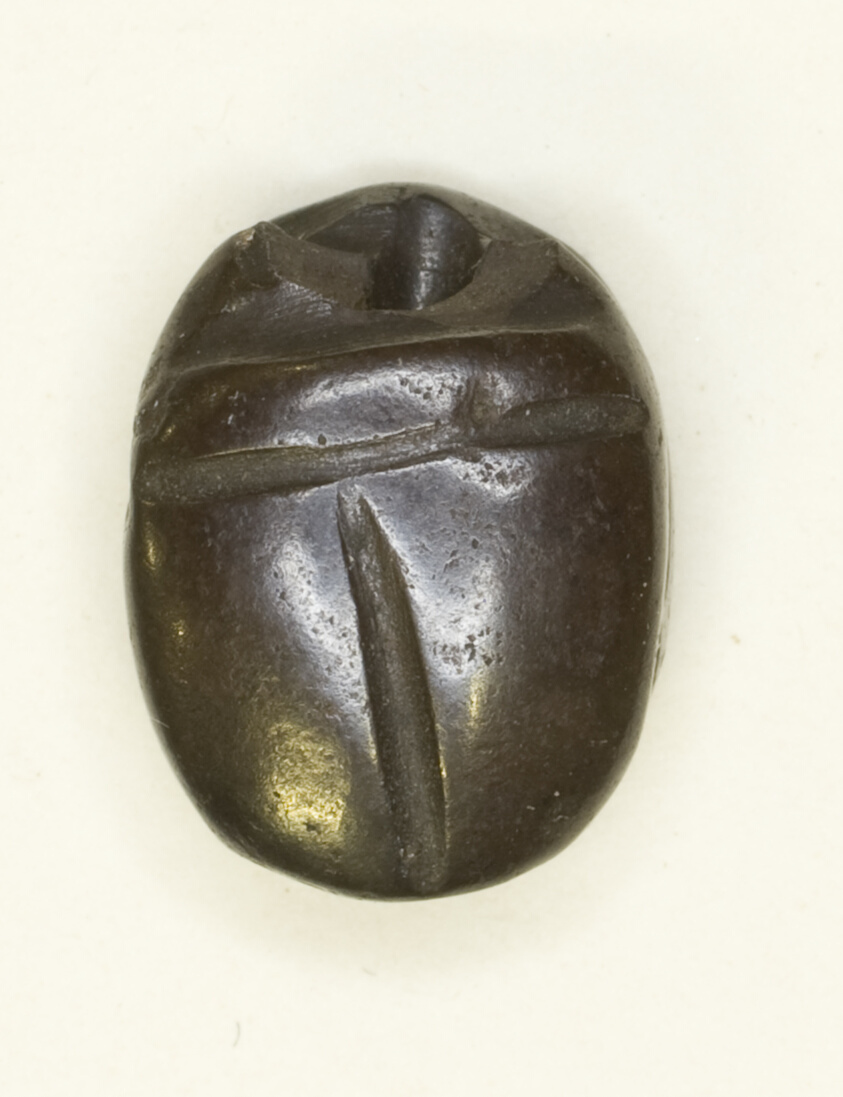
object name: Costume and Accessories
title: Scarab: Uninscribed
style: egyptian, third intermediate period, second intermediate period, new kingdom, late period (egyptian), ancient, middle kingdom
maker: Egyptian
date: Middle Kingdom–Late Period, Dynasties 12–26 (about 1985–525 BCE)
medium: Stone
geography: Egypt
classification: scarab; stone; ancient art; costume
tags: scarab beetle, insects